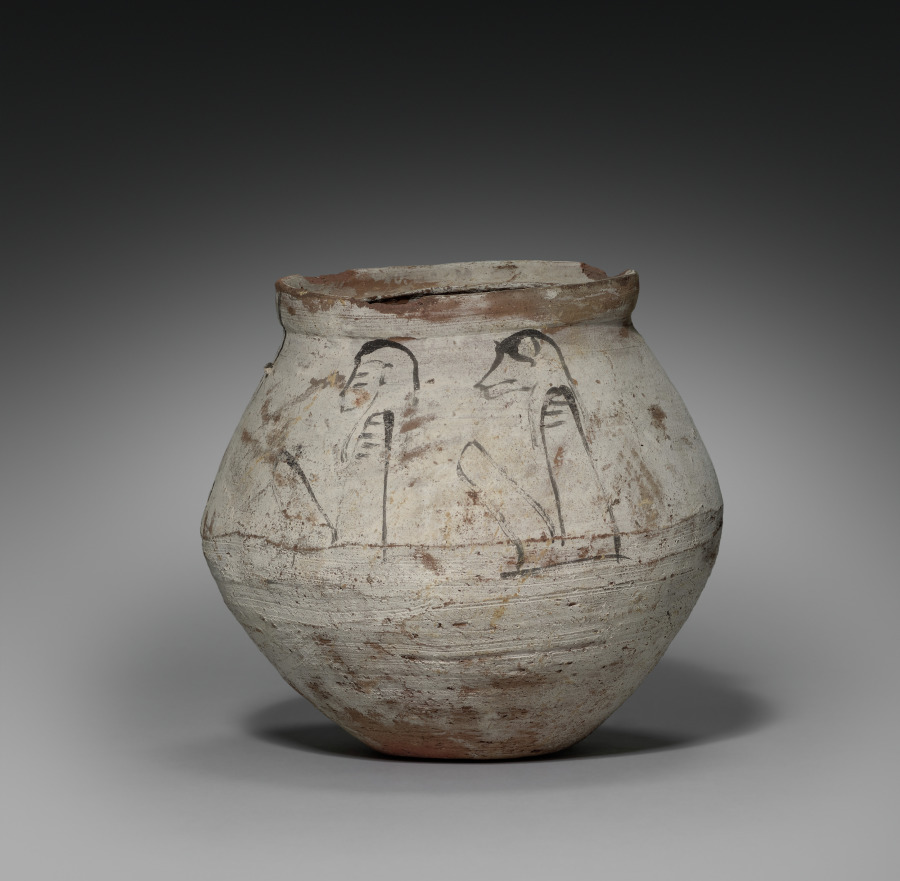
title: Shawabty Jar with Lid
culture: Egypt, New Kingdom (1540–1069 BCE), Dynasties 19–20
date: 1295–1069 BCE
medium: Nile silt ware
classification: Funerary Equipment